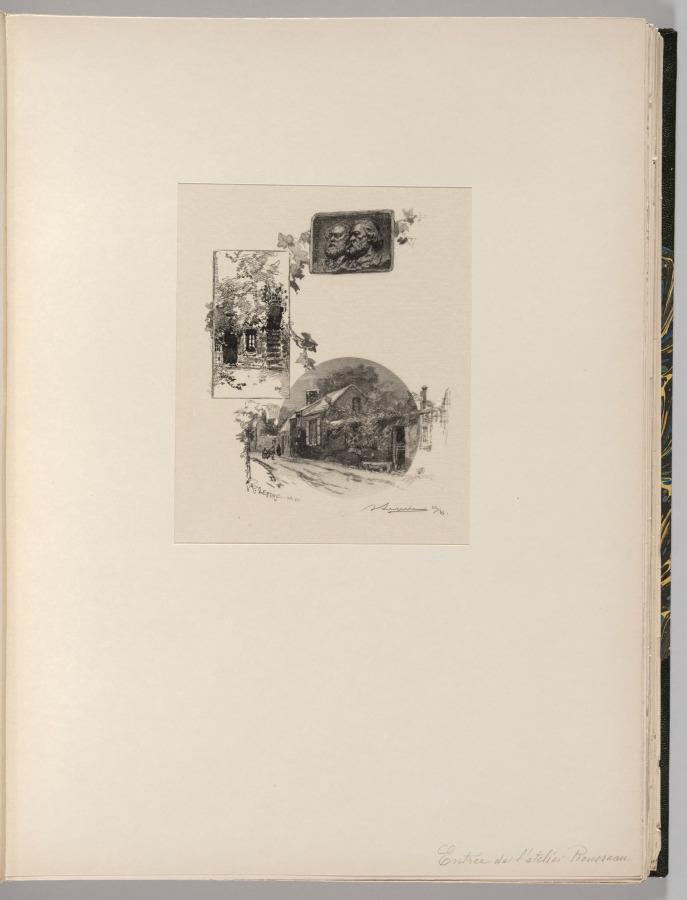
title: Fontainebleau Forest: Entry to Rousseau's Studio and the Millet Home (La Forêt de Fontainebleau: Entrée de l'atelier de Rousseau et maison de Millet)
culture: France, 19th century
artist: Auguste Louis Lepère (French, 1849–1918)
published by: A. Desmoulins, Published in Revue Illustrée, 1887–90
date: 1890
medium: wood engraving from bound volume of 34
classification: Bound Volume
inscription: Below image, lower right, in black ink: ALepère 22/35; in block, lower left: A. LEPÈRE / Del. sc; on window mat, lower right, in graphite: Entrée de l'atelier de Rousseau